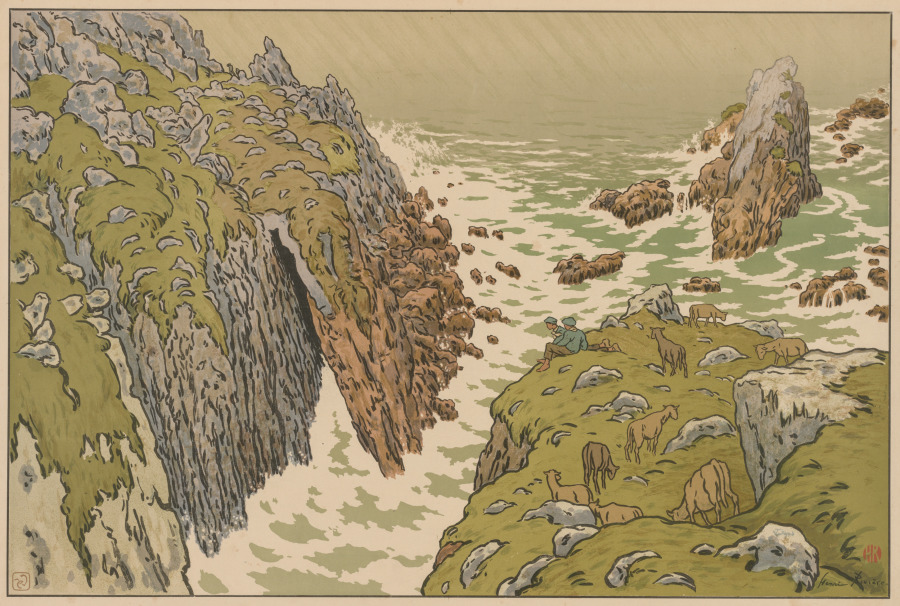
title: Aspects of Nature: The Cliff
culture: France, 19th century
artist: Henri Rivière (French, 1864–1951)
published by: Printed by Verneau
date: 1897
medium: color lithograph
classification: Print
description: One of sixteen images in the series Aspects of Nature, this lithograph depicts a view from Rivière’s summer home in Brittany. Rivière chose this site for the house—perched high atop gray rocks among pine trees and heather—because “[y]ou could believe yourself at the end of the world there . . . the noise of the winds and the sea, the cries of birds . . . a call of a sailor were the only sounds which enlivened the harmonious landscape, which changed in itself and its colors according to the effects and the hours.” This image of two children and a flock of sheep poised on a cliff’s edge overlooking a vast, turbulent sea perfectly evokes Rivière’s description. His brilliantly colored, large-format landscape prints played a pivotal role in the revival of the artistic lithograph at the end of the 19th century in France. The artist championed the idea that prints should be large in size, issued in large editions, and sold for relatively inexpensive prices so that art would be accessible to the general public. Rivière’s so-called mural prints were used to decorate homes, schools, shops, and restaurants.